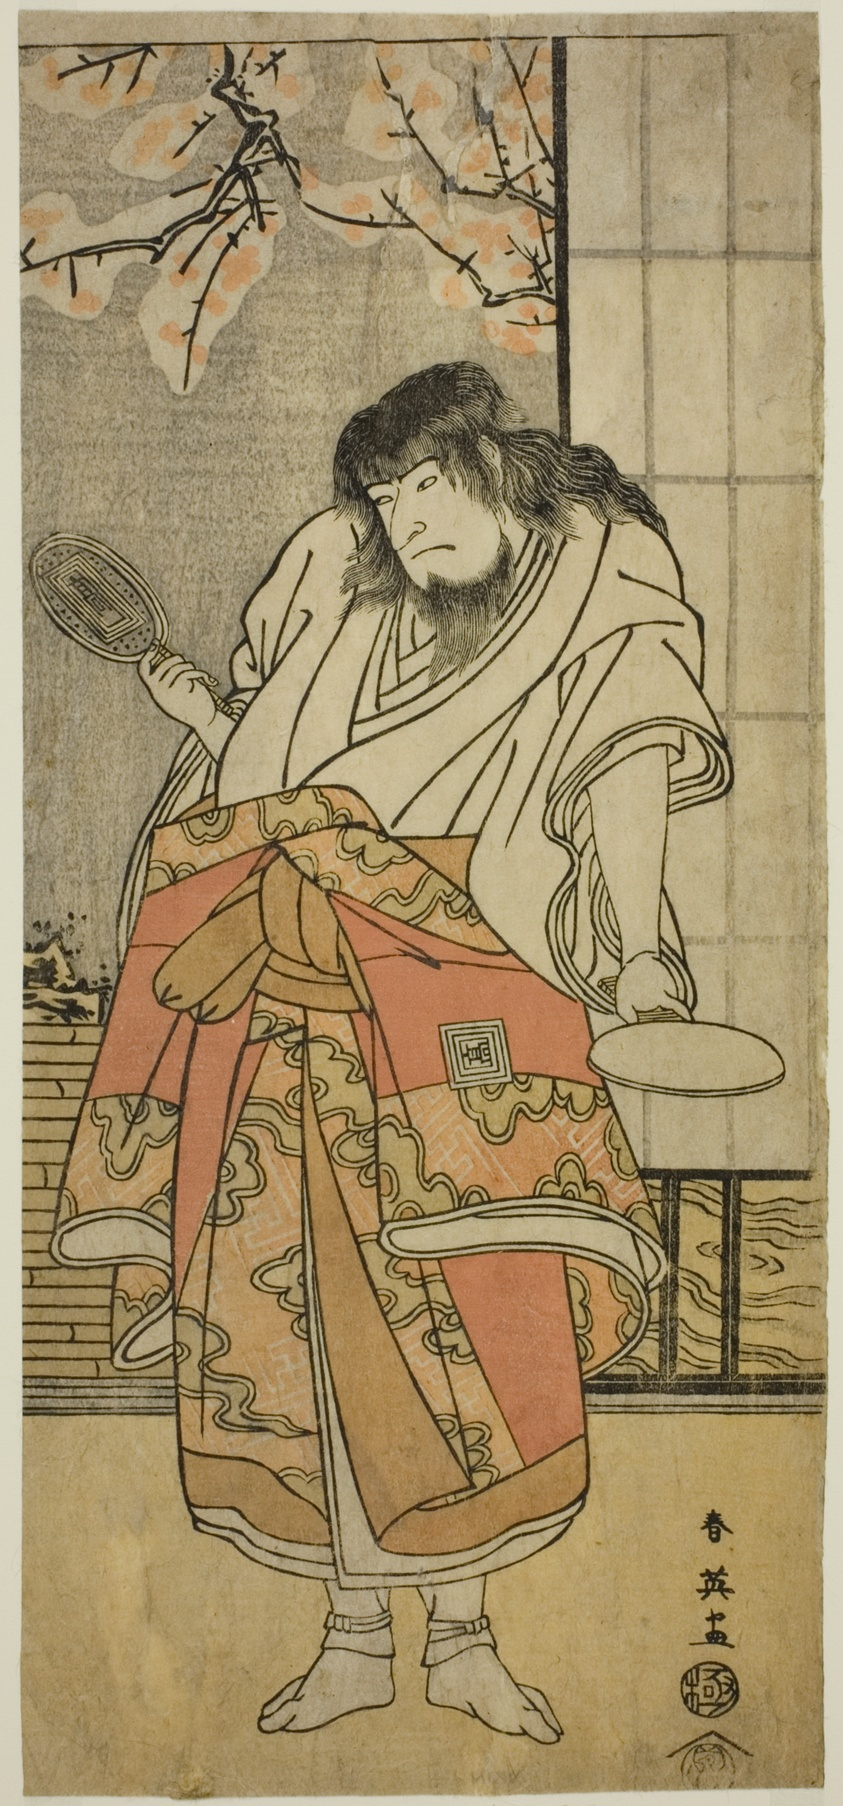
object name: Print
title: The Actor Ichikawa Komazo II as the monk Shunkan in the play "Shunkan Shima Monogatari," performed at the Kawarazaki Theater in the ninth month, 1791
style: Japanese (culture or style)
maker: Katsukawa Shun'ei (Japanese, 1762-1819)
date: c. 1791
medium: Color woodblock print; from a multisheet hosoban composition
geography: Japan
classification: woodblock print; print; asian art